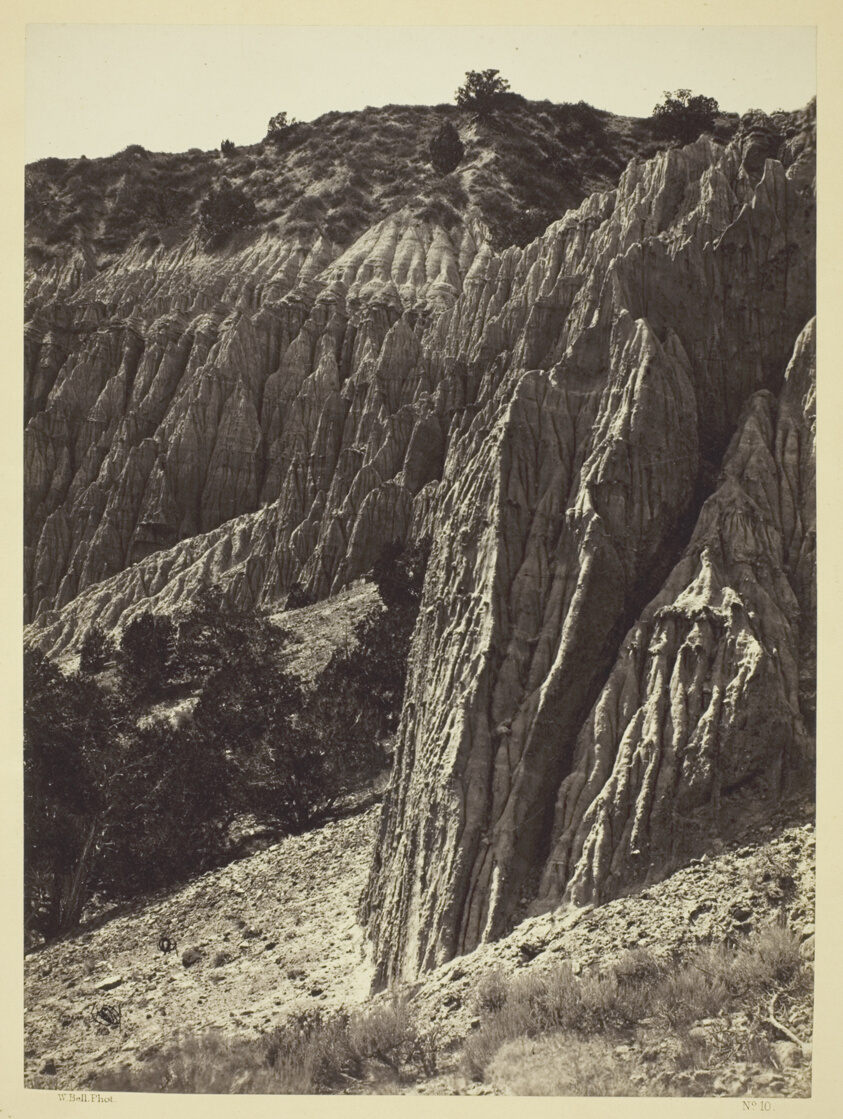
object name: Photograph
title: Rain Sculpture, Salt Creek Canon, Utah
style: 19th century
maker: William H. Bell (American, 1830–1910)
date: 1872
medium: Albumen print, from the album "Geographical & Geological Explorations & Surveys West of the 100th Meridian," vol. 1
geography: United States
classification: photograph; albumen silver print; photography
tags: Collected by Hugh Edwards